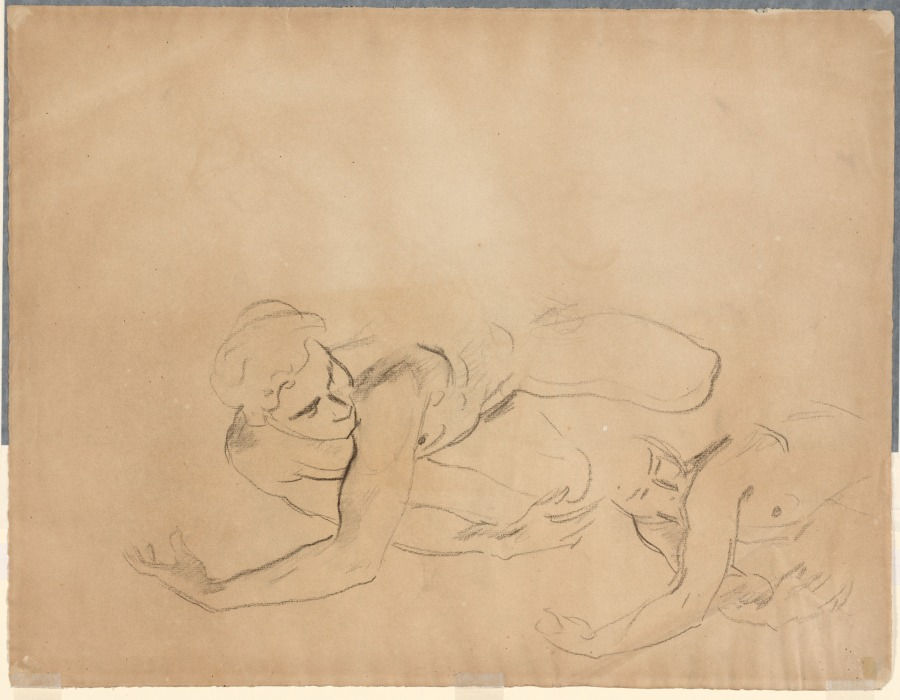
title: Studies of a Male Nude (verso)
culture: America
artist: John Singer Sargent (American, born Italy, 1856–1925)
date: 1918–19?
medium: charcoal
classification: Drawing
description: In 1919, Sargent exhibited a large painting at the Royal Academy of Art in London called Gassed. The Dressing Station at Le Bac and on the Doullers-Arras Road. The British War Memorial Committee had commissioned the work from him as a way of honoring the sacrifices of World War I. The subject was based on a scene the artist actually witnessed during his visit to battlefields in France in 1918. This drawing is a study for one of the soldiers in the painting, which now hangs in the Imperial War Museum in London.